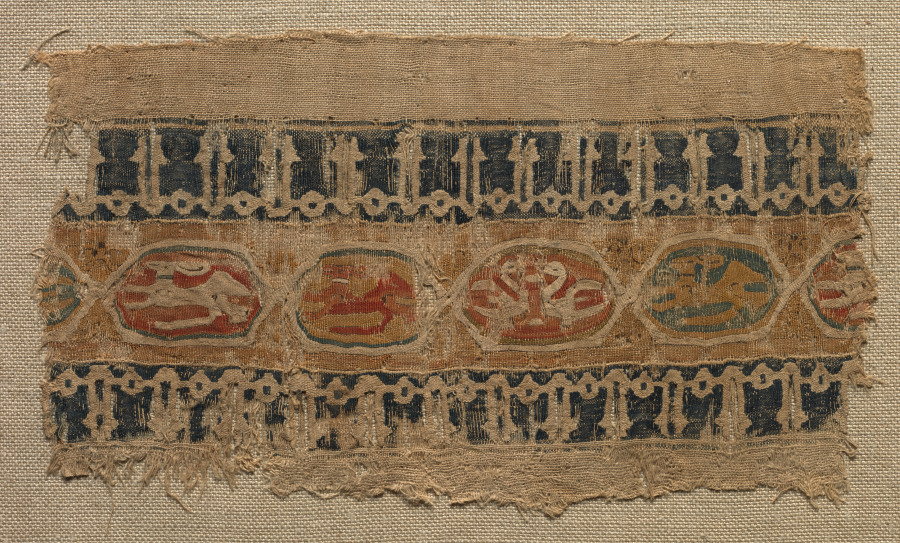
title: Fragment of a Tiraz-Style Textile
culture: Egypt, Fatimid period, Caliphate of al-Mustansir, 1000s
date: 1081–94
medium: tabby ground with inwoven tapestry ornament; linen and silk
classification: Textile